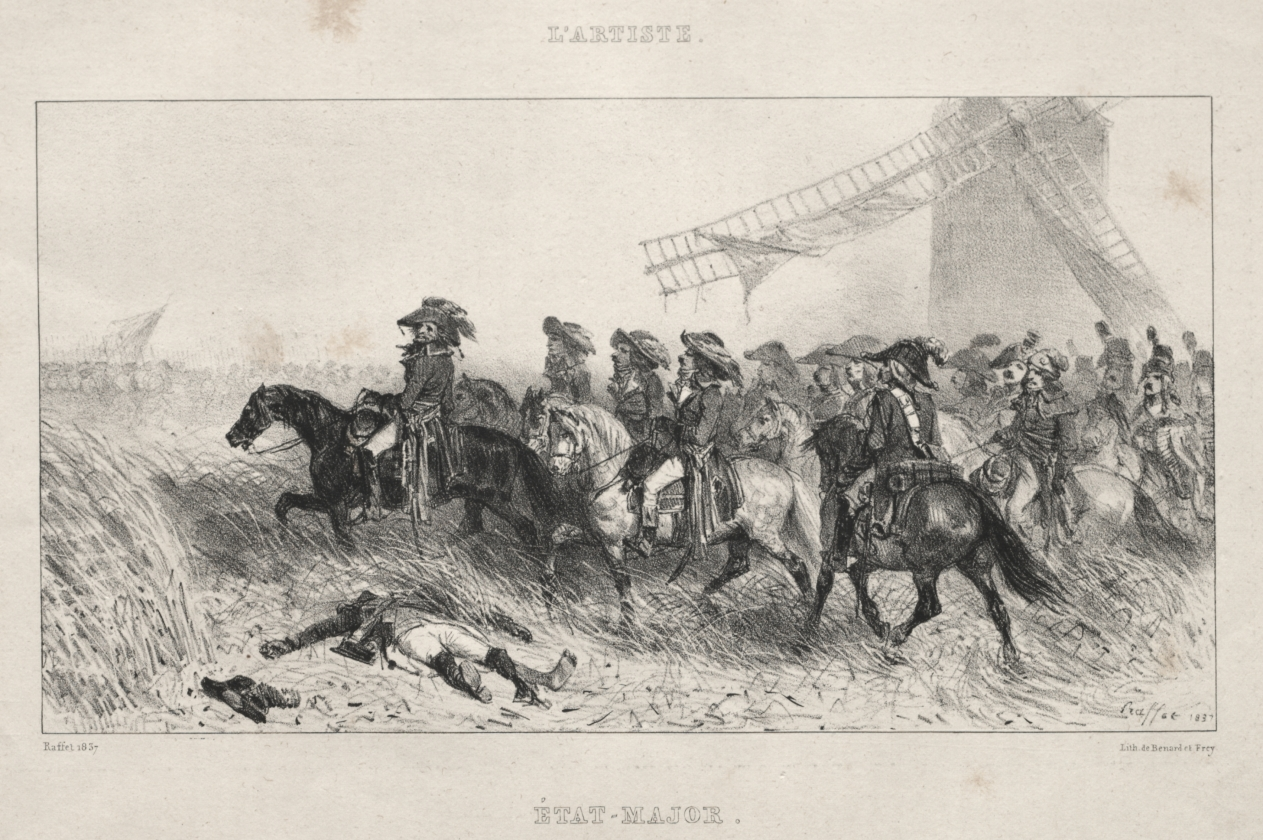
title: Untitled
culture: France, 19th century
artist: Auguste Raffet (French, 1804–1860)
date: 1837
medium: lithograph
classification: Print